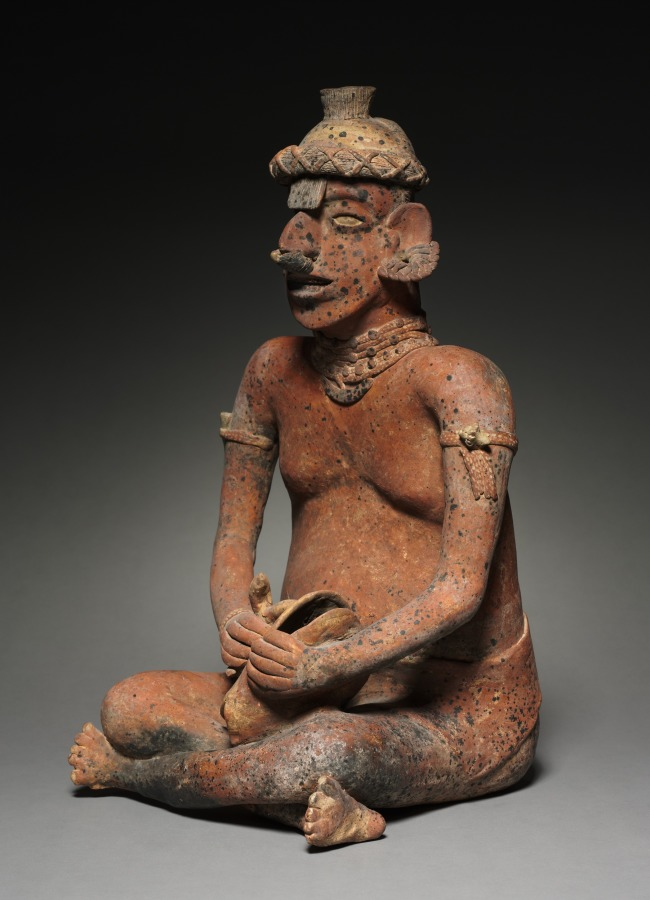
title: Male Seated Figure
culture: Mexico, Nayarit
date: 100 BCE–300 CE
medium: ceramic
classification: Ceramic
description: This couple-extremely fine examples of their kind-may commemorate the marriage of an important person, such as a chief, but could also represent siblings of a chiefly family. Whatever their relationship, their unity is conveyed by their physical similarities, including their jewelry, which marks high social station. The female is unusual in nursing an infant, likely a reference to generational renewal and the continuation of noble bloodlines. The significance of the male’s activity-beating a turtle-shell drum- is not understood.